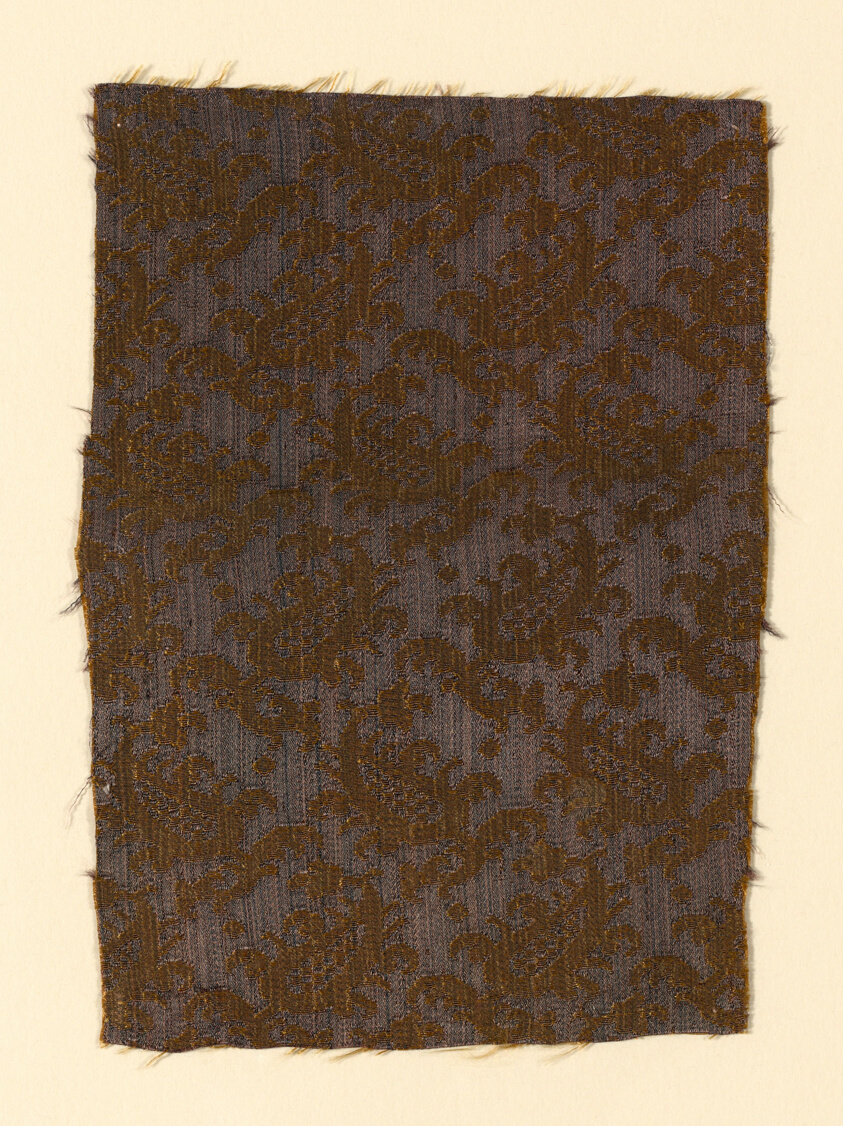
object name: Textile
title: Fragment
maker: Italy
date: First half 17th century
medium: Satin damask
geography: Italy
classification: textile; weaving